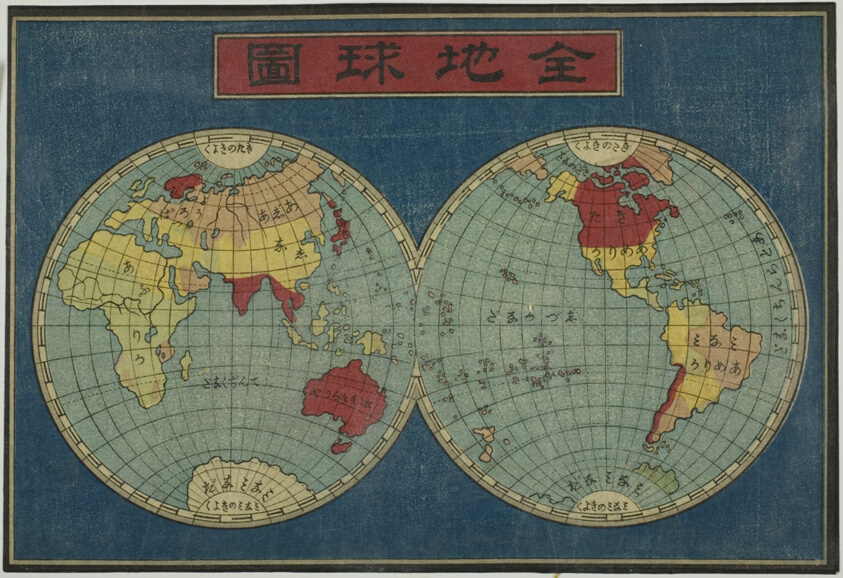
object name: Print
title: The Map of the Globe, Terminal Page of the set of eight Pictures of Foreign Ships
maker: Unknown Artist (Japanese, date unknown)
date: 1840s–1850s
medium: Color woodblock print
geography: Japan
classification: woodblock print; print; asian art